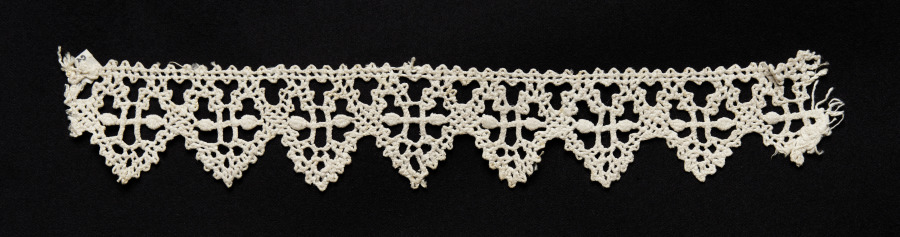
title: Lace Edging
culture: Italy, Genoa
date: 1550–99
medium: Bobbin lace (needle lace, reticella and punto in aria designs)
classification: Lace